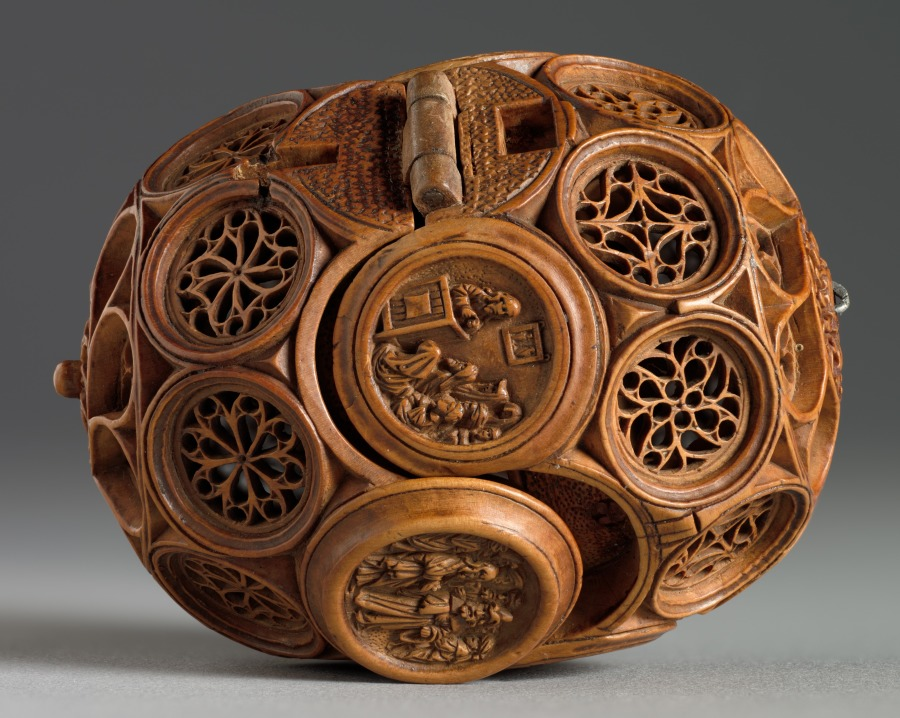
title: Prayer Nut with Scenes from the Life of St. James the Greater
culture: Northern Netherlands (Holland)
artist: Adam Dircksz (Netherlandish, active c. 1500)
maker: and Workshop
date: c. 1500–1530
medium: boxwood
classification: Sculpture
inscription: Interior around lower half: SANCTVS SACRILEGI STAT IVDICIS ANTE TRIBVNAL (Holiness stands before the throne of the profane judge)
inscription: Interior, around upper half: GAVDENS PRO CRISTO IACOBVS SVBDIT CAPVT ENSI (St James submits his head to the sword)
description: Prayer nuts are capsules that can be opened in half and were mainly worn from the end of the 1400s until 1530, particularly in the Netherlands. These objects are generally made from boxwood and carved with extreme refinement and delicacy. They often echo Gothic architecture and include openwork tracery or elaborate decorative patterns. Prayer nuts came into fashion for private devotion as a pendant on the rosary or on a decorative chain. The emergence of prayer nuts went hand in hand with the practice of praying the rosary more frequently at the end of the Middle Ages.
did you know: This miniature masterpiece was held and caressed within the palm of the holder as they prayed and meditated on their faith. What do you use to focus or engage in quiet concentration?